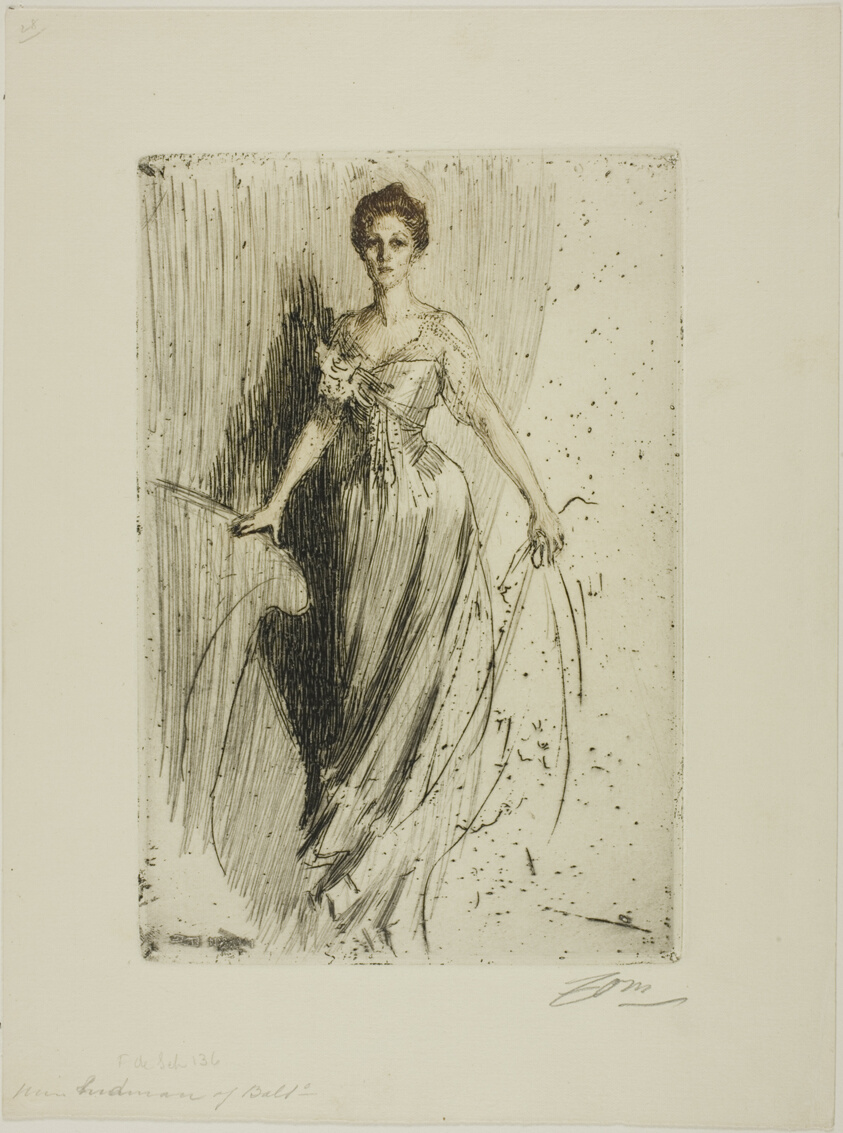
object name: Print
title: Miss Lurman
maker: Anders Zorn (Swedish, 1860-1920)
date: 1901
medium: Etching, partly in color, on ivory laid paper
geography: Sweden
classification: etching; print; prints and drawing